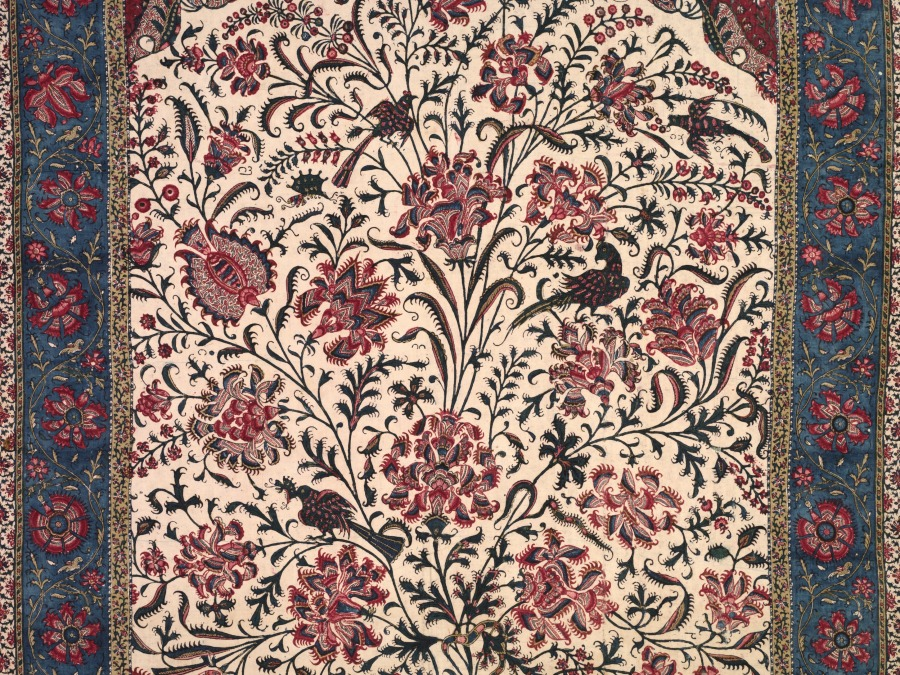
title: Chintz door curtain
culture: Iran, Isfahan, Qajar period (1779–1925)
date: 1800s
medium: Cotton: plain weave; chintz; hand drawing and block printing: bleach, mordant, and dye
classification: Textile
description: Lightweight white cotton cloth was transformed into this beautiful chintz, admired for its vibrant and durable colors, stunning pattern, fine quality, and rarity. Peacocks and a variety of birds appear amid vines with fanciful blossoms in the niche field and main border. Striking end borders feature blossoms in leaf-outlined diamonds on alternating ground colors of white, mustard, red, and blue. The complex chintz technique involving hand drawing, block printing, bleach, mordant, and dyes was developed in India. By the 1600s and 1700s, chintz was designed to target European and Asian markets and often featured large tree-of-life patterns. Chintz was also made in Iran by the 1400s, but this rare door curtain from the 1800s is among the oldest known examples.